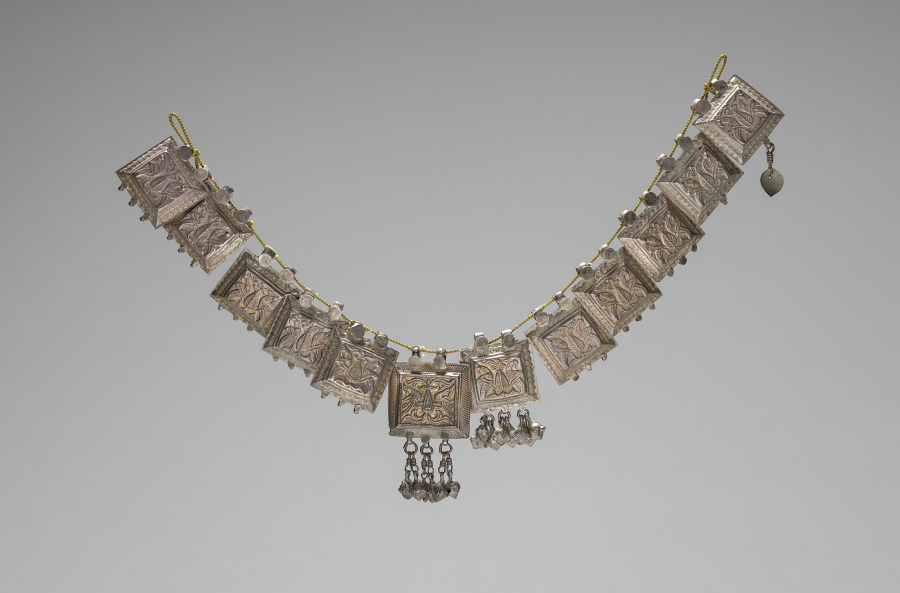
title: Necklace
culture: India, Punjab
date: 1800s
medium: silver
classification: Jewelry